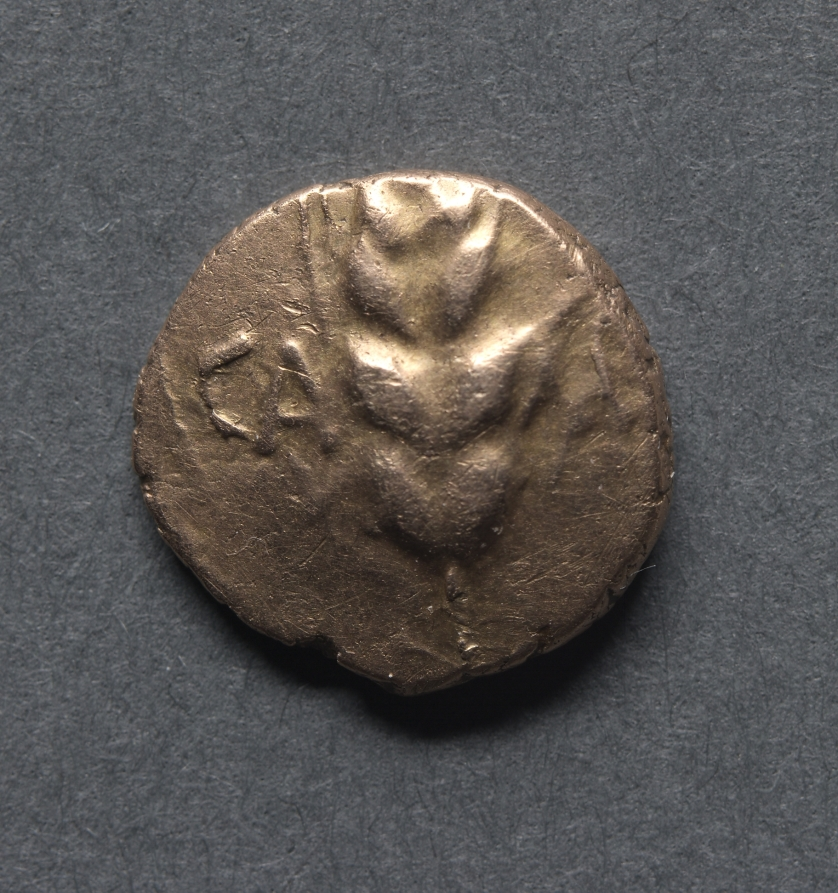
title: Cunobeline Quarter Stater: Corn (obverse)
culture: England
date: c. 10–40 CE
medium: gold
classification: Coins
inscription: "CA MV" divided by an ear of corn with a stalk up the centre.